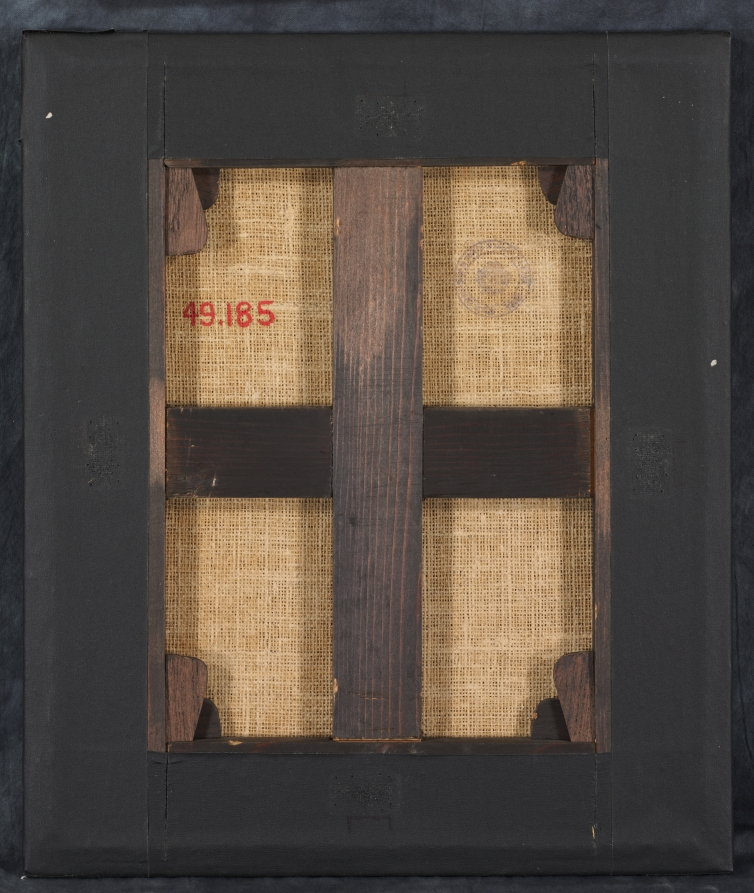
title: Holy Family with a Shepherd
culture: Italy, 16th century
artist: Battista Dossi (Italian, c. 1490–1548)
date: early 1520s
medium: oil on canvas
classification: Painting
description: In this image of the Holy Family, Joseph and Mary lean in to admire the Christ Child while a shepherd looks on, leaning on his staff. Before executing this painting, Battista visited Rome, including an extensive study of Raphael's works. Afterward, Battista began a second style of painting, seen in the flexible pose of Christ, the small hands of the adult figures, the high foreheads, and each figure looking sideways or upward. The landscape is impressionistic and grainy as mysterious silvery-blue moonlight accents the thickly wooded landscape. Rich reds, browns, and greens color the picturesque landscapes, typical of Battista's second style. This small painting was originally attributed to Battista Dossi's brother, Dosso. Both brothers served as court painters to the Duke Alfonso I of Ferrara. However, the symmetry and vibrant colors of the painting, as well as the facial styles of the figures, characterize the work of Battista Dossi.